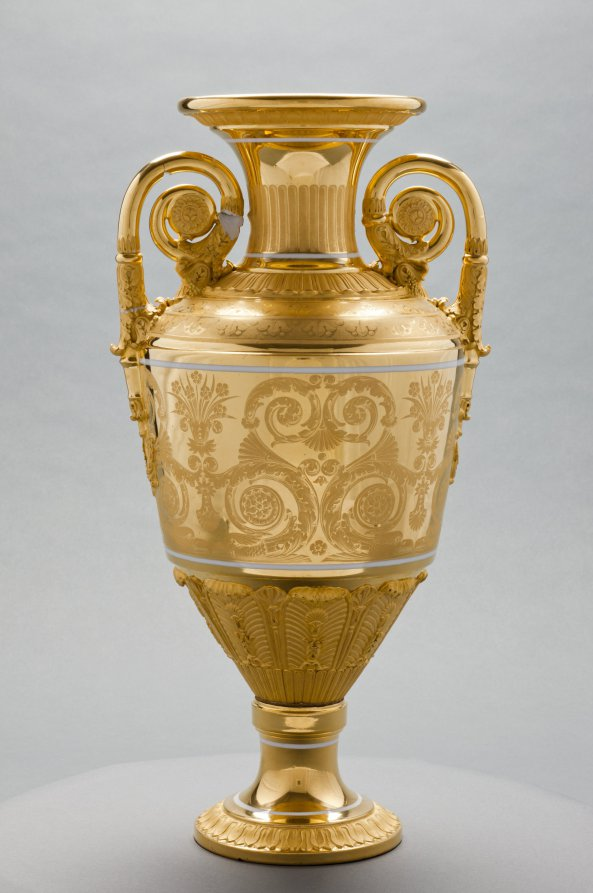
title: Vase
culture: Russia, St. Petersburg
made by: St. Petersburg Imperial Porcelain Factory (Russian)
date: c. 1820–1830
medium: gilt porcelain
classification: Ceramic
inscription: inscribed: "Moreau" in gold near lip.